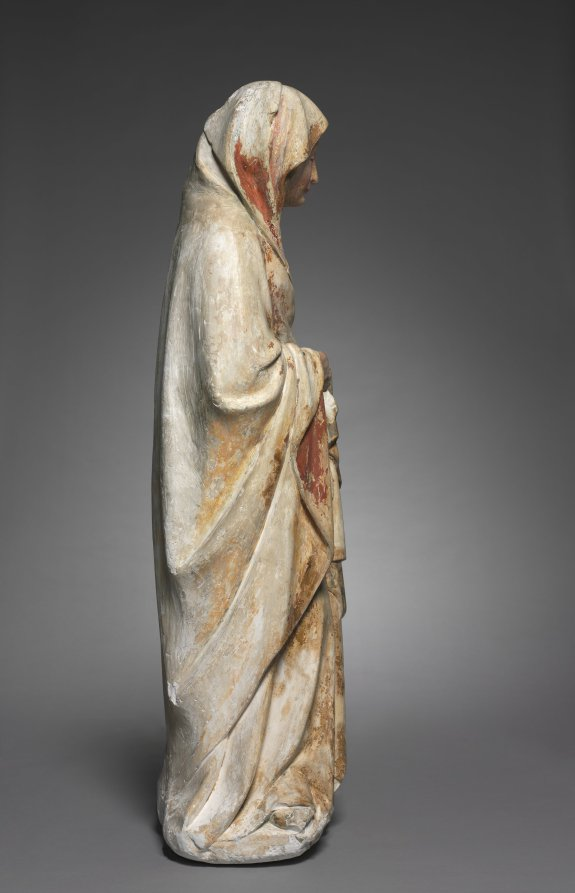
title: Standing Virgin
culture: Netherlands, active Dijon, 15th century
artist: follower of Claus de Werve (Netherlandish, 1380–1439)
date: c. 1440–1450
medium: painted and gilded limestone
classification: Sculpture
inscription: inscriptions on reverse.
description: This standing Virgin now lacks the child she once cradled in her left arm. The sculpture may have been damaged in the French Revolution by falling onto its face. It was carved from soft white limestone of a type known to be quarried at Asnières-lès-Dijon, near Champmol. The figure recalls many of the hallmarks of the style of Claus de Werve, a Netherlandish artist active at the court of Burgundy. The Virgin has a sweet, round face that is also smooth and fleshy, her eyelids droop pensively and she is engulfed in rich voluminous draperies that cascade in deep folds. This sculpture should be seen as a charming reflection of de Werve’s many Virgin and Child groups. It was probably carved by a follower closely acquainted with his style.